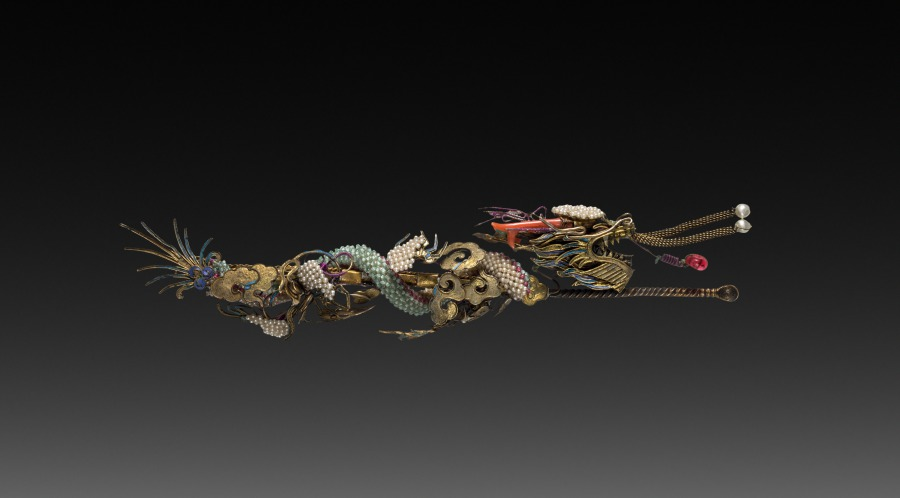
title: Ear Cleaner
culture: China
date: early 1900s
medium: seed pearls and wire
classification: Jewelry